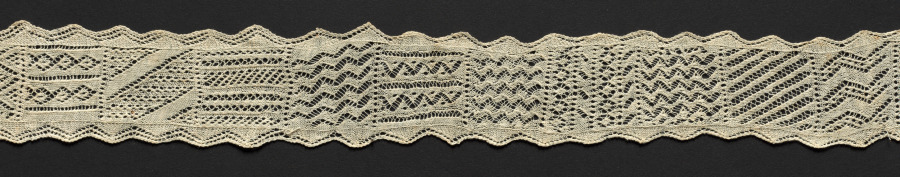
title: Knitted Lace Sampler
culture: Italy, Sienna, 19th century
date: 19th century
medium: knitted linen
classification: Sampler